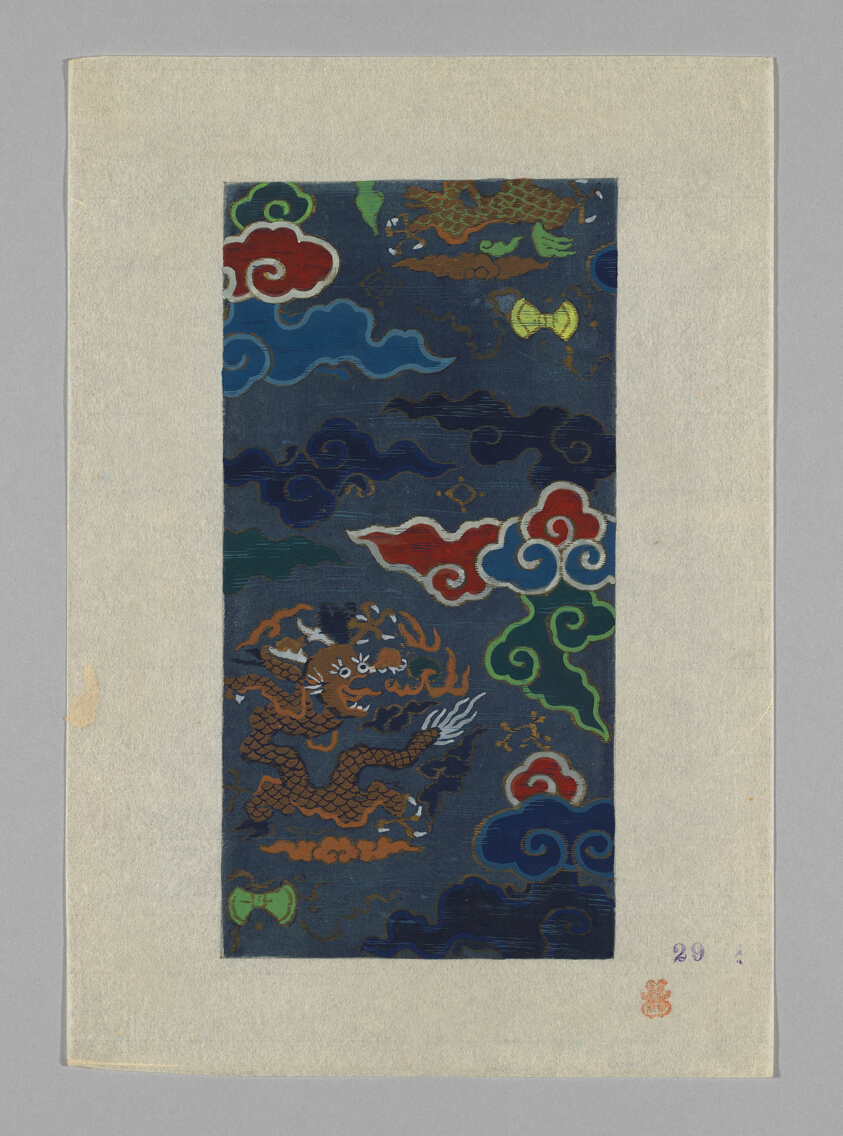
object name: Drawing and Watercolor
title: Design on Paper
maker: Japan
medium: Paper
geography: Japan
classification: textile; accessory - paper design; watercolor; paper